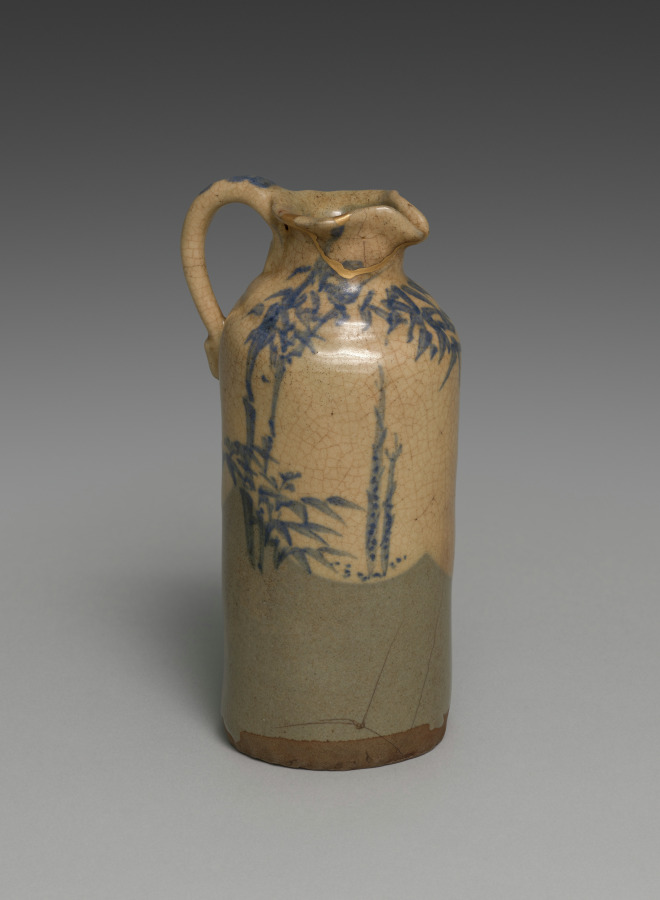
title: Sake Pourer with Bamboo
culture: Japan, Edo period (1615–1868)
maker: attributed to Seifū Yohei I (Japanese, 1801–1861)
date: c. 1844–57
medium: one of a pair of sake flasks; stoneware with white slip, underglaze blue and gold repair (kintsugi) (Kyoto ware)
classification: Ceramic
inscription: The storage box for the pair of vessels is inscribed and impressed with seals.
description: This pair of sake pourers adorned with with bamboo and bellflowers is attributed to the founder of the Seifū Studio, Seifū Yohei I (1801–1861). Yohei I, the lineage founder, was born to the Yasuda family in the city of Kanazawa, which faces the Sea of Japan. His home province of Kaga (in present-day Ishikawa Prefecture) produced its own ceramics, known as Kutani ware, but for his training as a potter, Yohei I chose Kyoto, which produced the more technically advanced porcelainware. He moved to Kyoto around the 1820s and became apprenticed to Nin’ami Dohachi, a leading potter in the city. He later struck out on his own, and it is likely that his teacher gave him the name Seifu Yohei. His works include many exquisitely painted copies of Chinese porcelain, and he also produced stoneware with overglaze color enamels that emulated works in the style of Ogata Kenzan (1663–1743) at which his teacher excelled.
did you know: Sake may be served heated or chilled, and, as with wine, the recommended serving temperature of sake varies greatly by type.